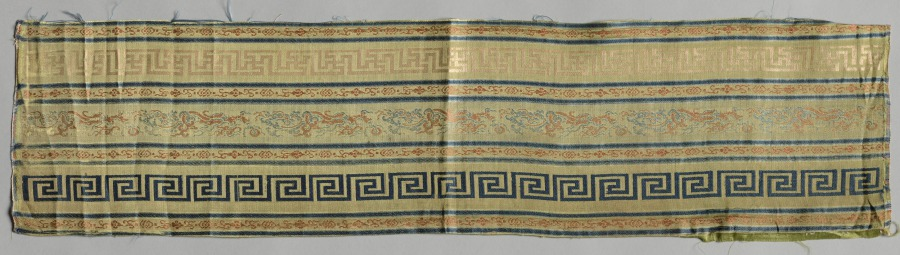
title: Fragment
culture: China, 19th century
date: 1800s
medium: silk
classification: Textile